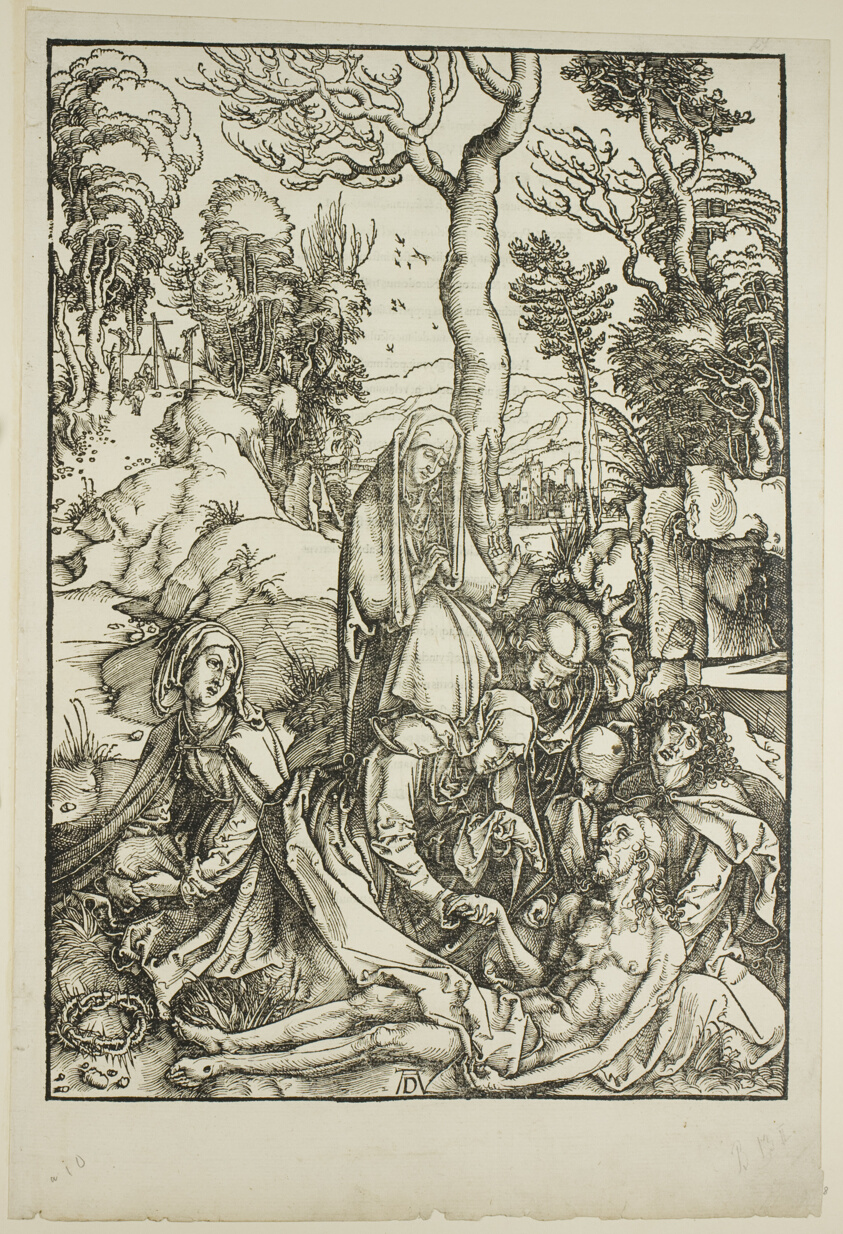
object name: Print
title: The Lamentation, from The Large Passion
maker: Albrecht Dürer (German, 1471-1528)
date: c. 1498–99, published 1511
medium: Woodcut in black on ivory laid paper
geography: Germany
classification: woodcut; print; prints and drawing; paper